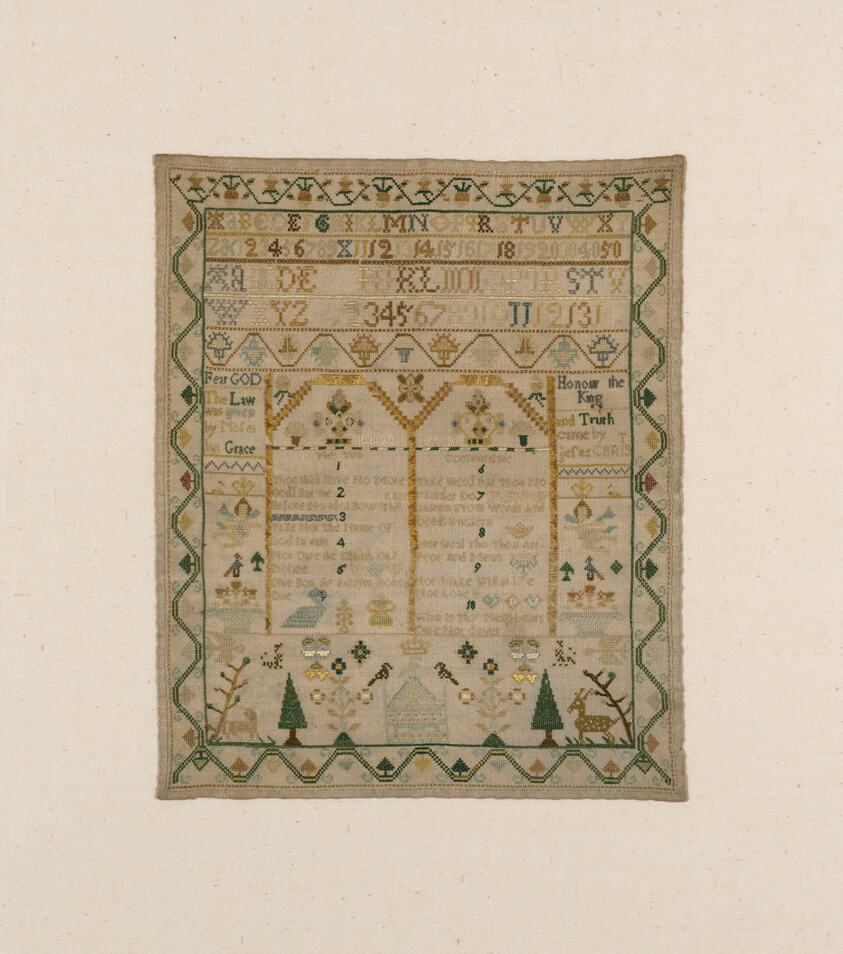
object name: Textile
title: Sampler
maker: England or United States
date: 1775/1825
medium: Linen, plain weave, embroidered with silk floss in Algerian eye, antique hem, cross, outline, satin and stem stitches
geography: England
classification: textile; needlework (visual works); sampler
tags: trees, circles